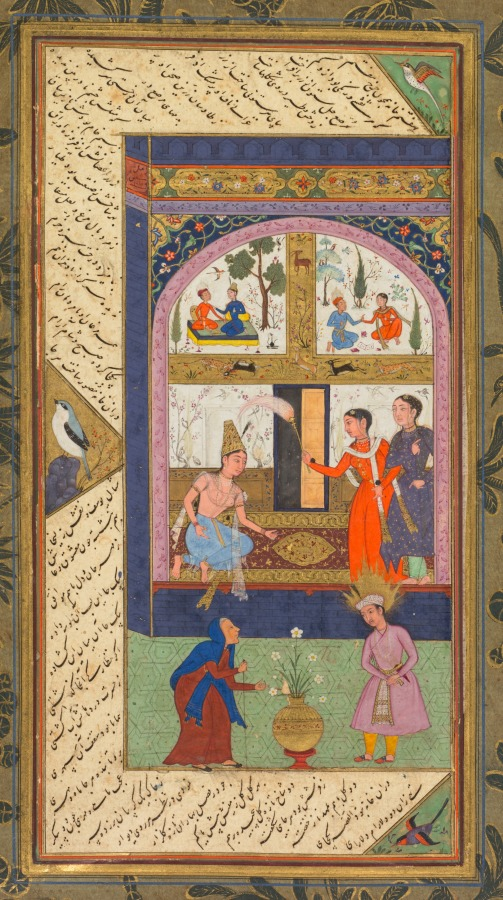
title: Folios A and B from the "Five Treasures" (Panj Ganj) of Jami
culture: India, Mughal patronage in Deccan style, early 17th century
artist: Mushfiq (Indian, active early 1600s)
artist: and others (Indian)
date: 1520–1607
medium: Gum tempera, ink, and gold on paper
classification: Painting